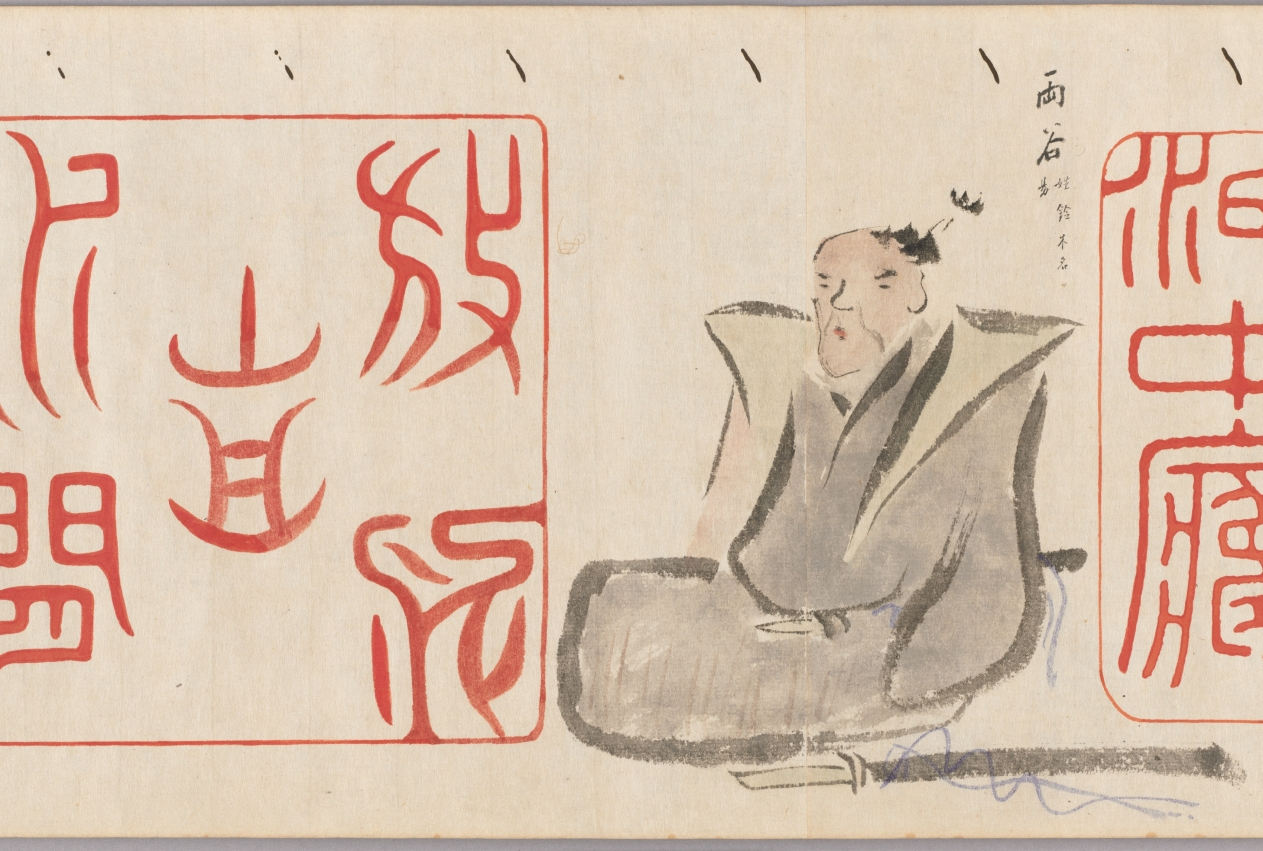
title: Chinese Seals and Poets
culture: Japan, Edo period (1615–1868)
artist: Hosokawa Rinkoku (Japanese, 1779–1843)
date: 1842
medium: handscroll; ink and color on paper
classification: Painting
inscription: Eight seal impressions are painted in red and alternate with sketchily painted figures. Artist's colophon at end of scroll.